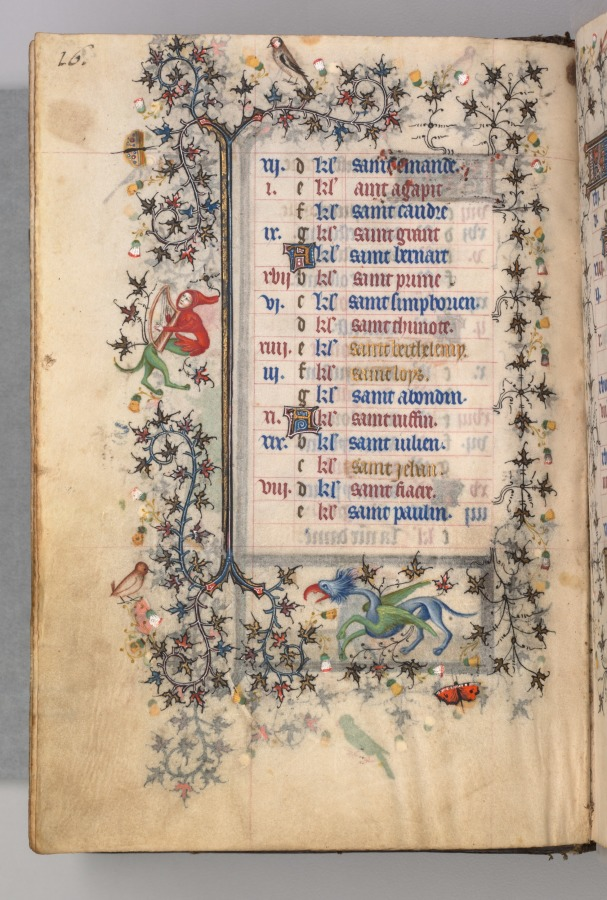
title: Hours of Charles the Noble, King of Navarre (1361-1425): fol. 8v, August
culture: France, Paris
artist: Master of the Brussels Initials and Associates (French)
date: c. 1405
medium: ink, tempera, and gold on vellum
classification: Bound Volume